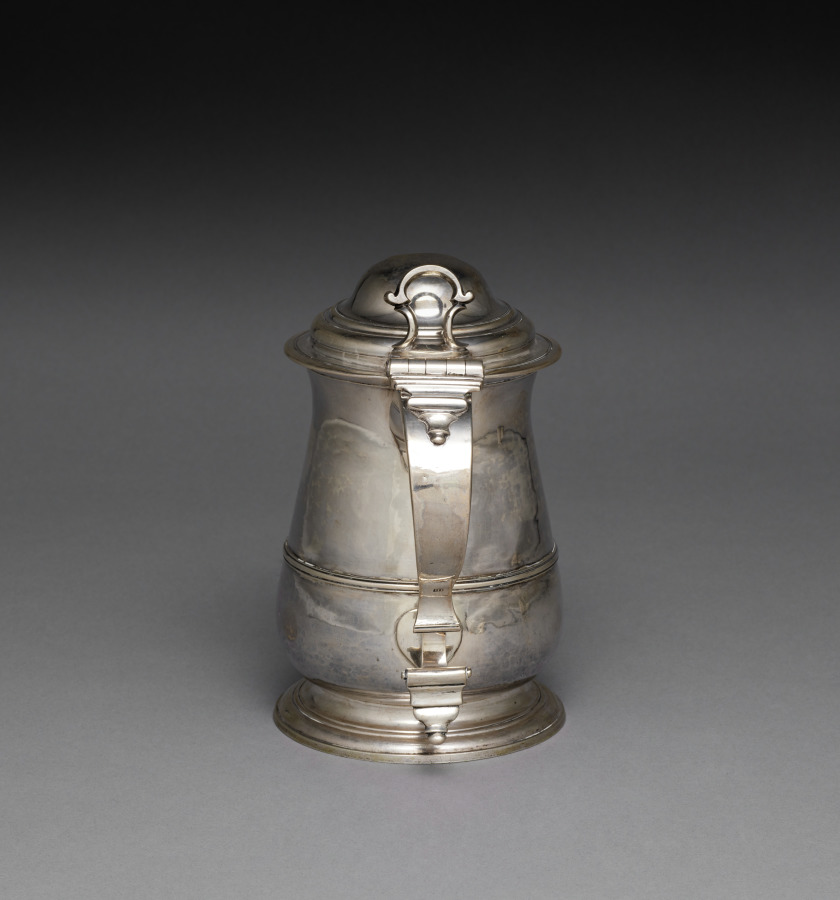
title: Tankard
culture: England, 18th century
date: c. 1760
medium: silver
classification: Silver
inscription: Scratched underside: "11 oz 13 'u 10".